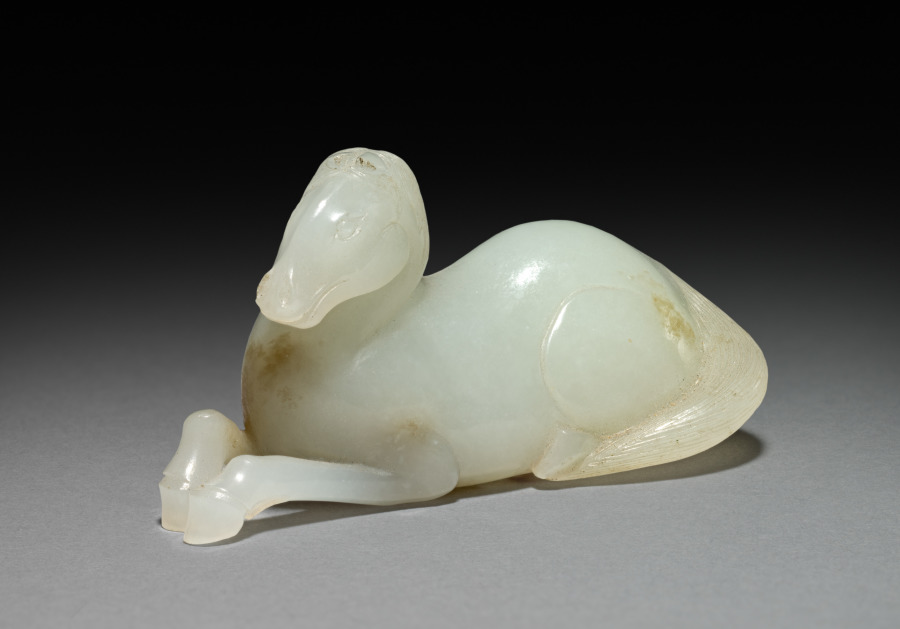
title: Horse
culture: China, Qing dynasty (1644-1911)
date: 1600s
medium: jade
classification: Jade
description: In China, access to political power was granted to those who passed the civil service examinations, a system that offered official service only at a high level of education. Chinese literati-officials whose daily routine was administrative work in an office, enjoyed precious objects on their writing desks that offered distraction and demonstrated good taste. By the Ming (1368–1644) and Qing (1644–1911) dynasties, these utensils of the literati studio became also collectibles and were treasured as artworks. Desk objects included paper weights; seals and seal paste boxes; brush rests, wrist rests and brush holders; water droppers, ink cakes, miniature mountains, and albums, all ranging in material from jade, gilt bronze, lacquer, and wood to porcelain.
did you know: The white jade surface of the horse has been brightly polished, but portions of the original stone's "skin" remain on the base and below the head.